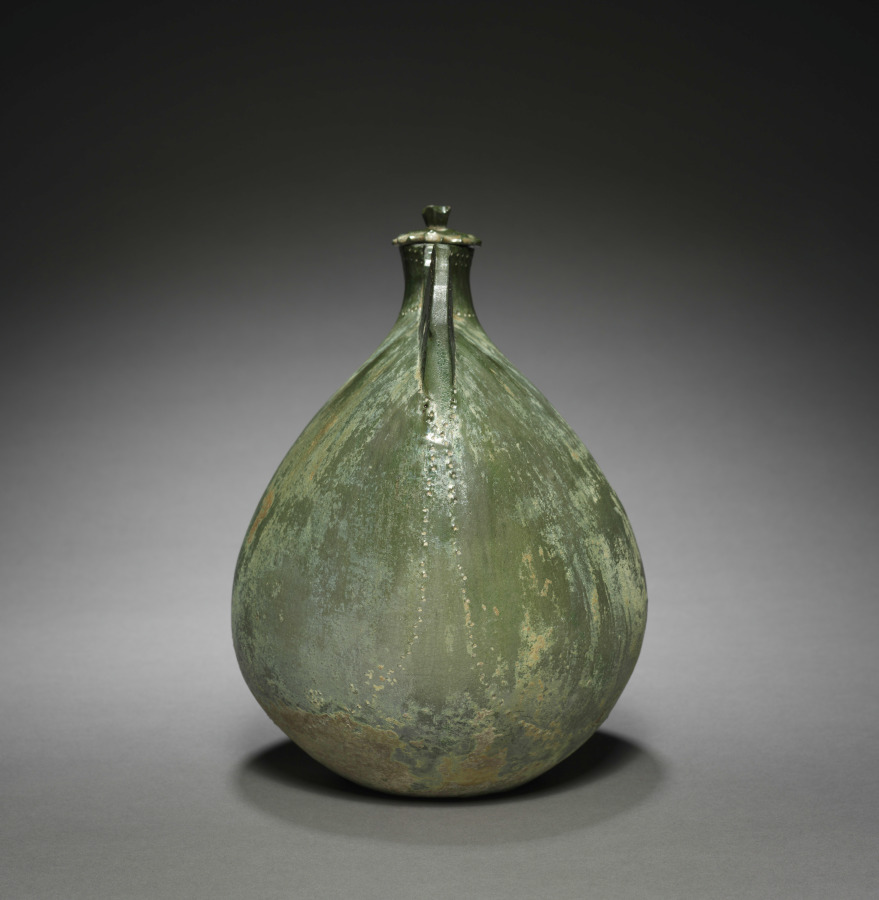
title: Leather Bag-Shaped Flask with Cover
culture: Northeast China, Liao dynasty (916-1125)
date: 916–1125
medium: earthenware with green glaze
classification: Ceramic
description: Flasks like these derive their shapes from leather bags; even the edges are finely rouletted to resemble the seams of sewn leather. These were used by the nomadic Khitan people who established the Liao kingdom in Inner Mongolia, Manchuria, and North China. Such wares represented the Liao adoption of the Tang Chinese ceramic tradition, and yet they expressed ethnic identity and new innovations resulted from the cultural borrowing.